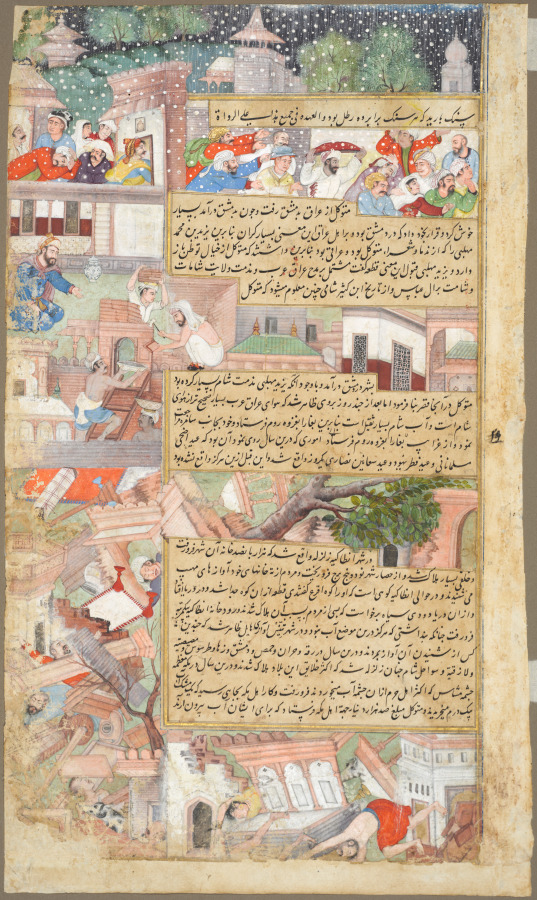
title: Page of disasters, from the Tarikh-i Alfi (History of the Thousand [Years])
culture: India, Mughal, 16th century, made for Akbar (reigned 1556–1605)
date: c. 1595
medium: Gum tempera, ink, and gold on paper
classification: Painting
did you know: Devastation after an earthquake includes a horse trapped under a fallen pavilion.